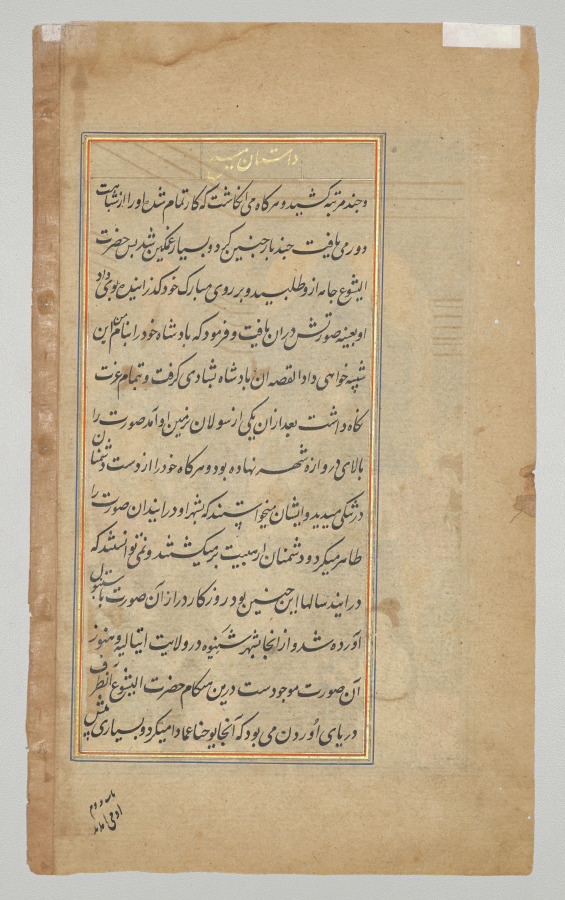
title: Jesus being portrayed by King Abgar’s painter (folio 143 recto), from a Mirror of Holiness (Mir’at al-quds) of Father Jerome Xavier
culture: Mughal India, Allahabad, made for Prince Salim (1569–1627)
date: 1602–4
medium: Gum tempera, ink, color, and gold on paper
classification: Manuscript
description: Jesus sits under a golden lamp with a cloth in his hand, while an artist sits before him, struggling to paint his portrait. The artist had been sent by his king, Abgar of Edessa, who was ill and believed the portrait would cure him. Jesus pitied the artist and pressed his face to the cloth to create a perfect impression. The miraculous cloth became known as the Mandylion and was venerated by Christians as a relic of Christ. The similarity between the names Abgar and Akbar suggests that Father Jerome included this noncanonical story in his biography of Jesus to resonate with and inspire the Mughal emperor.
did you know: Artist’s pigments are arranged in shells next to the brass cup for water.